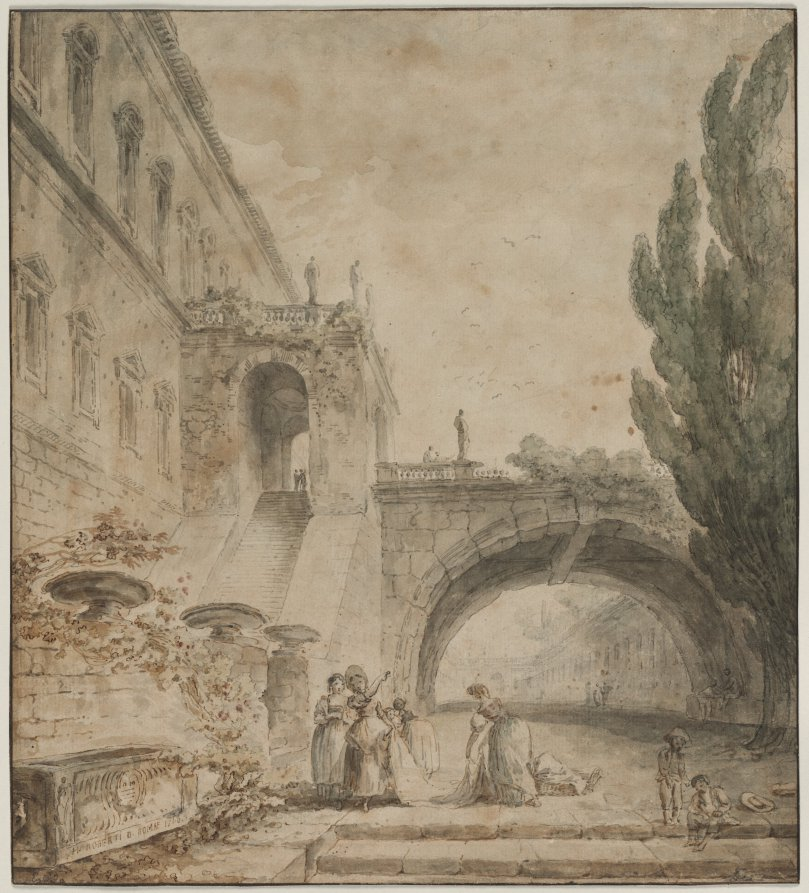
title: A Palace with an Arched Bridge (A Roman Villa)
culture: France, 18th century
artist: Hubert Robert (French, 1733–1808)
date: 1760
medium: pen and brown and gray ink, graphite, and watercolor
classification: Drawing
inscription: Signed and dated, lower left (on water trough) in brown ink: "H. Roberti D. Romae 1760"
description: Hubert Robert had been living in Rome for five years when he executed this watercolor. He was fascinated by the architecture and gardens he saw in Italy and became especially interested in the picturesque interaction between Italy's rich artistic past and the daily life he saw on the streets. This sheet does not represent an actual view. It is, rather, an invention of the artist, who liked to create architectural fantasies by combining the different types of structures he became familiar with in Rome. Here, he enlivened the view with washerwomen doing laundry.